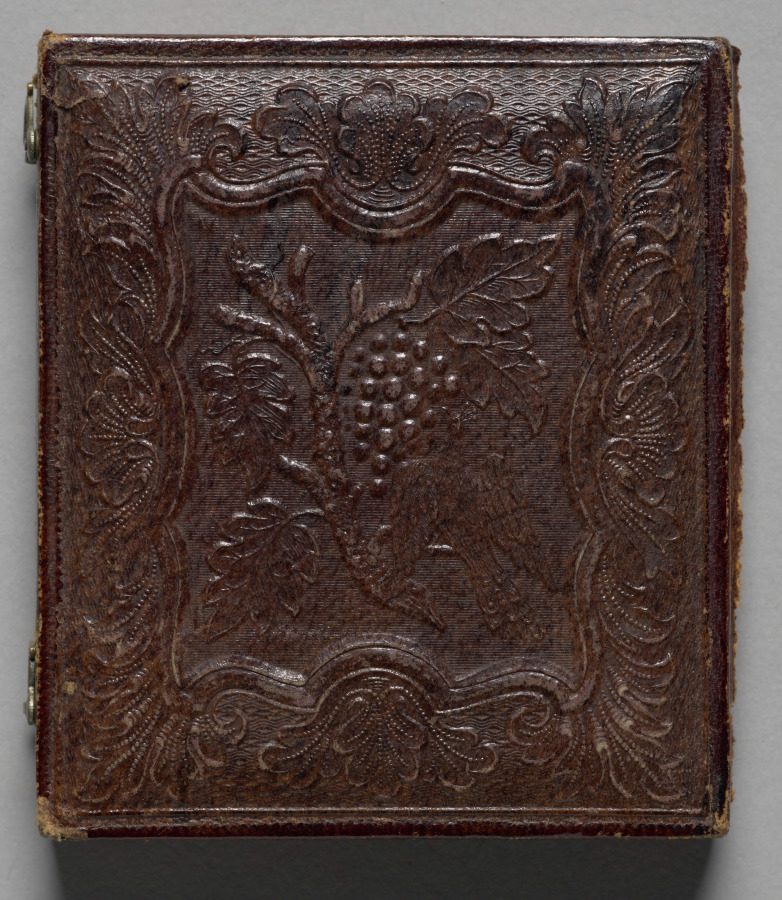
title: Black Woman and White Child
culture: America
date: c. 1855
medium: daguerreotype, sixth plate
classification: Photograph